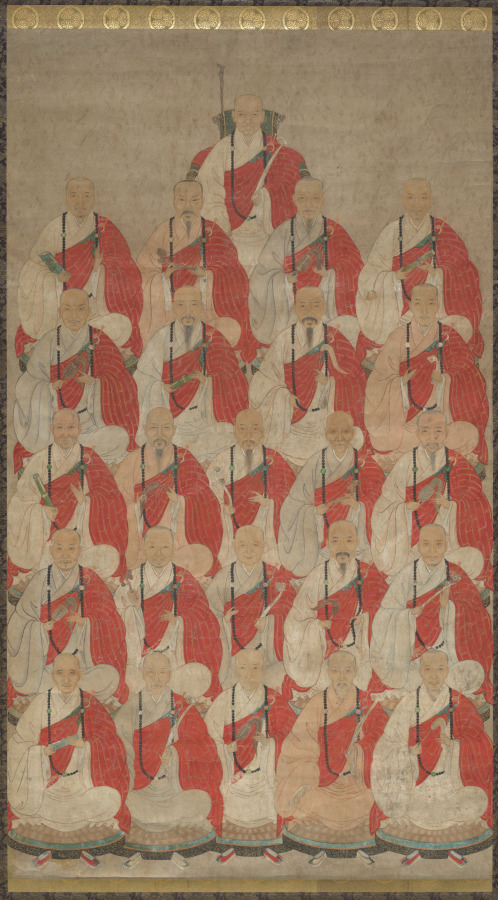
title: Lineage Portrait of Buddhist Monks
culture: China, Qing dynasty (1644–1911)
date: 1600s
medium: hanging scroll mounted on a panel (framed); ink, color, and gold on paper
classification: Painting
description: This painting features 24 Buddhist priests, likely of several generations and members of the same temple or school. The priests are depicted with attention to individual features and appearances, dressed in their formal garments. They may represent monks of the Ōbaku school, a form of Chan (Japanese: Zen) Buddhism founded in Japan by Chinese émigré monks and their Japanese followers.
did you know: The painting has remnants of a Japanese mounting, indicating that it was once kept in Japan.